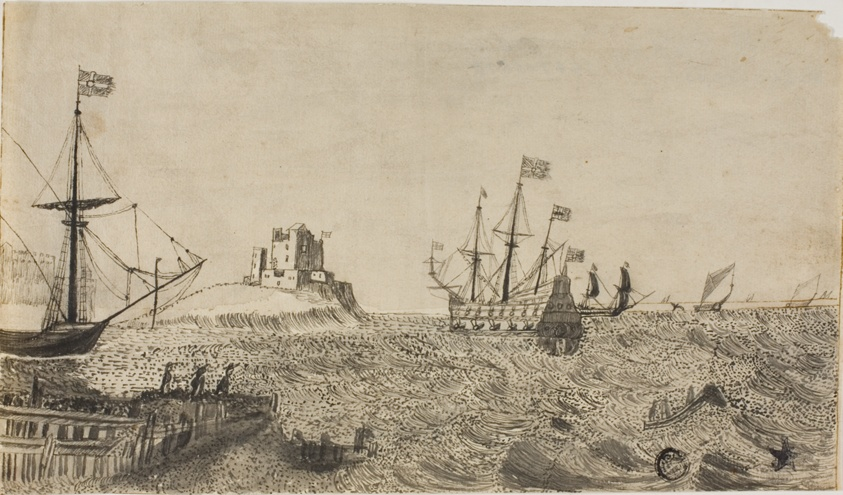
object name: Drawing and Watercolor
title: Swedish Boats Off the Coast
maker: Wenceslaus Hollar or after; Bohemian, 1607-1677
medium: Pen and black ink, with brush and gray wash, and touches of pen and brown ink, on cream laid paper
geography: Bohemia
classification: pen and ink drawings; drawings (visual works); prints and drawing